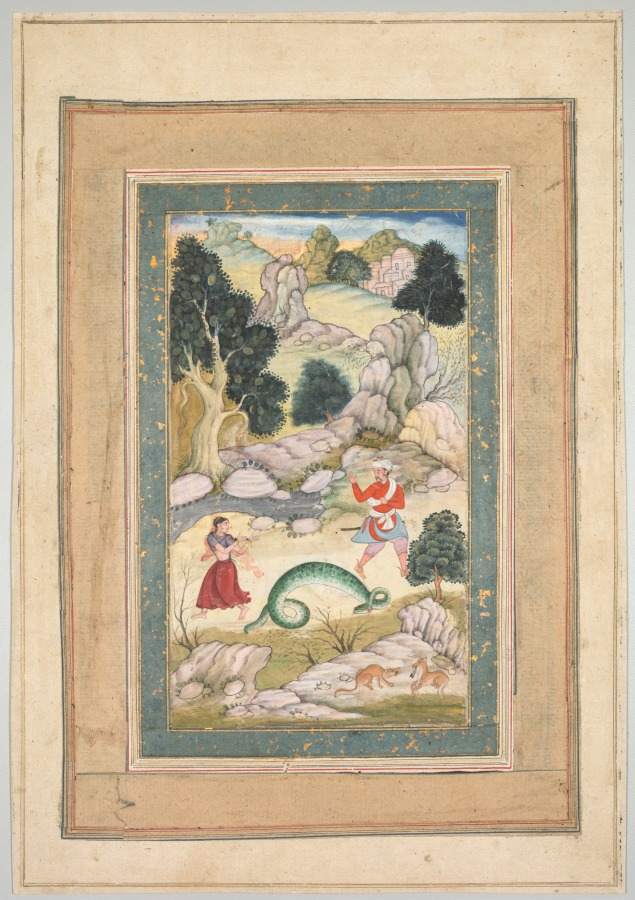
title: Lovers Parting, Page from a Book of Fables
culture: Northern India, Mughal court, 16th century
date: c. 1590–95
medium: Gum tempera and gold on paper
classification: Painting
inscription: Banyavati inscription in Devenagari script in left margin describing the subject of the miniature: 'We failed to understand each other when we were together, the understanding in that respect may come to us on being separated".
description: The lovers have met in a remote wilderness location, away from the city shown in the distance. However, their affair has run its course, and they decide to part ways, each walking in opposite directions through an ominous landscape, where strange rock formations and an oversized serpent-slain by foxes gnawing on its innards-lend a sense of foreboding. As Mughal court painting developed into the last decades of the 16th century, artists began using increasingly muted colors and gentler shading techniques than they did in the more robust Adventures of Hamza at the left. The omission of a light source and shadows adds to a timeless, otherworldly impression to the landscape.